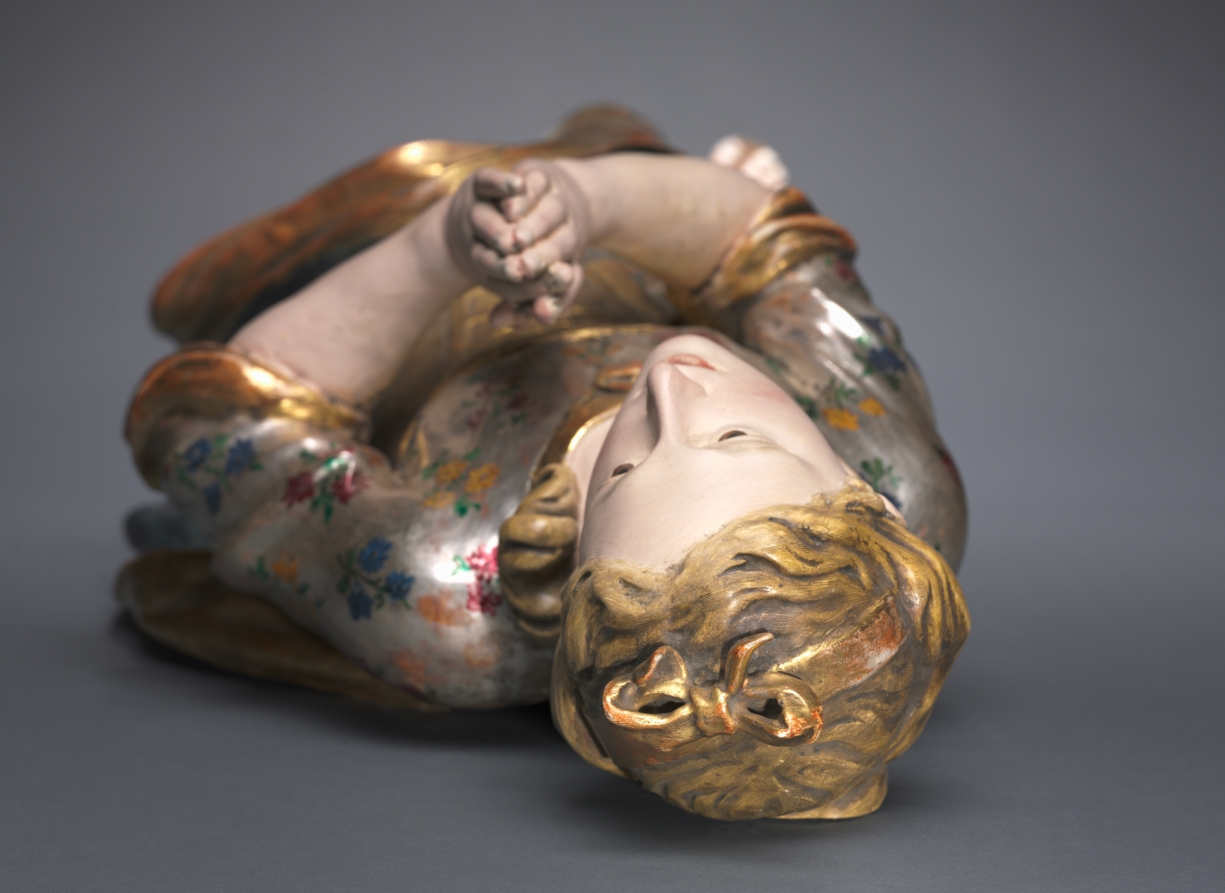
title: Virgin Mary as a Child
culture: Austria, Vienna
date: 1750–75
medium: painted and gilded wood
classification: Sculpture